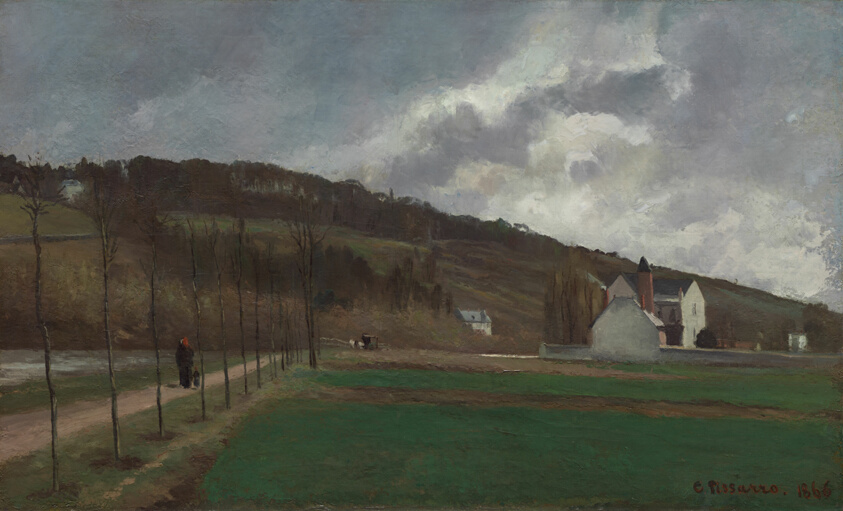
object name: Painting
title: The Banks of the Marne in Winter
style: Impressionism, 19th century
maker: Camille Pissarro (French, 1830–1903)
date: 1866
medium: Oil on canvas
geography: France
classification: oil on canvas; paint; painting; european painting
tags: weather/seasons, paths, trees, figures, building, hills, landscapes